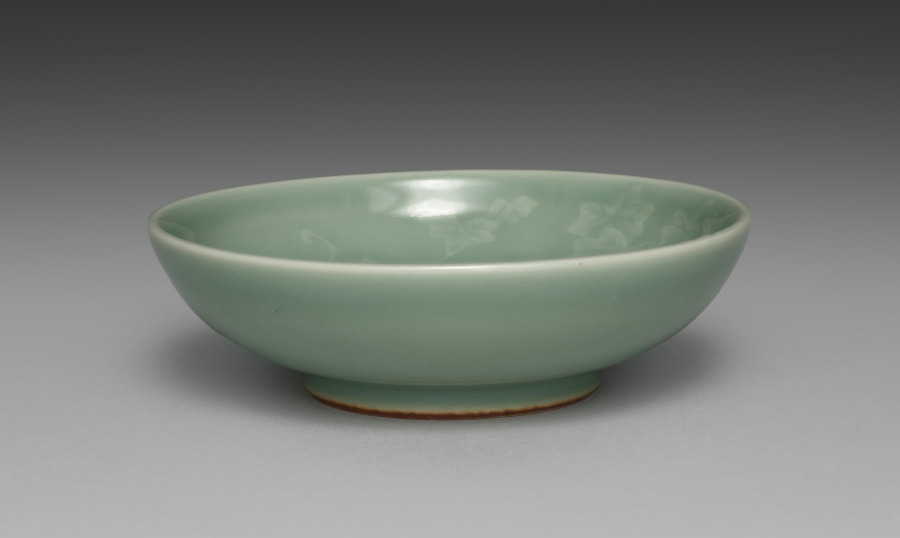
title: Dish from Dishes with Ivy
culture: Japan, Meiji period (1868–1912)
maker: Seifū Yohei III (Japanese, 1851–1914)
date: 1893–1914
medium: One from a set of five dishes; porcelain with green glaze and molded designs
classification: Ceramic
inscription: 清風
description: Yohei III’s main output for his sophisticated clientele was in the form of tea sets and dining sets. He often produced in pairs, sets of five, or sets of ten. This set of five dishes with a green glaze and designs of ivy vines in very low relief has unfortunately lost its box. These dishes are slightly larger than the other dishes, like CMA 2022.187, and so may have been not saucers but rather small plates for meals.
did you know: In his career, Seifū Yohei III created a range of dishes in green glazes.